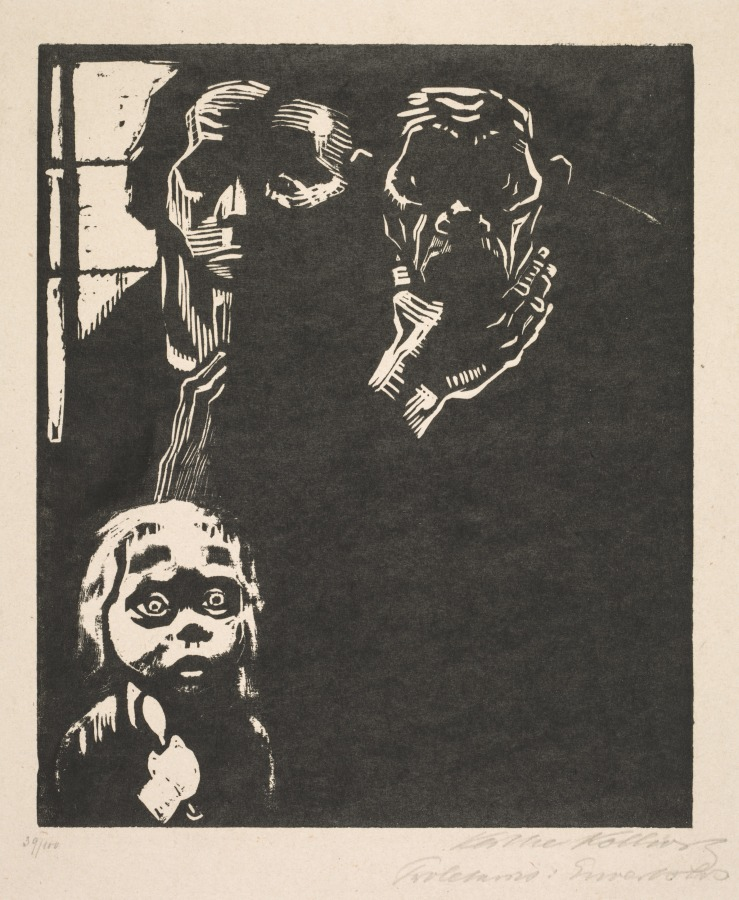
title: Proletariat: No. 1 Out of Work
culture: Germany, 20th century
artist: Käthe Kollwitz (German, 1867–1945)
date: 1925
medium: woodcut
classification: Print